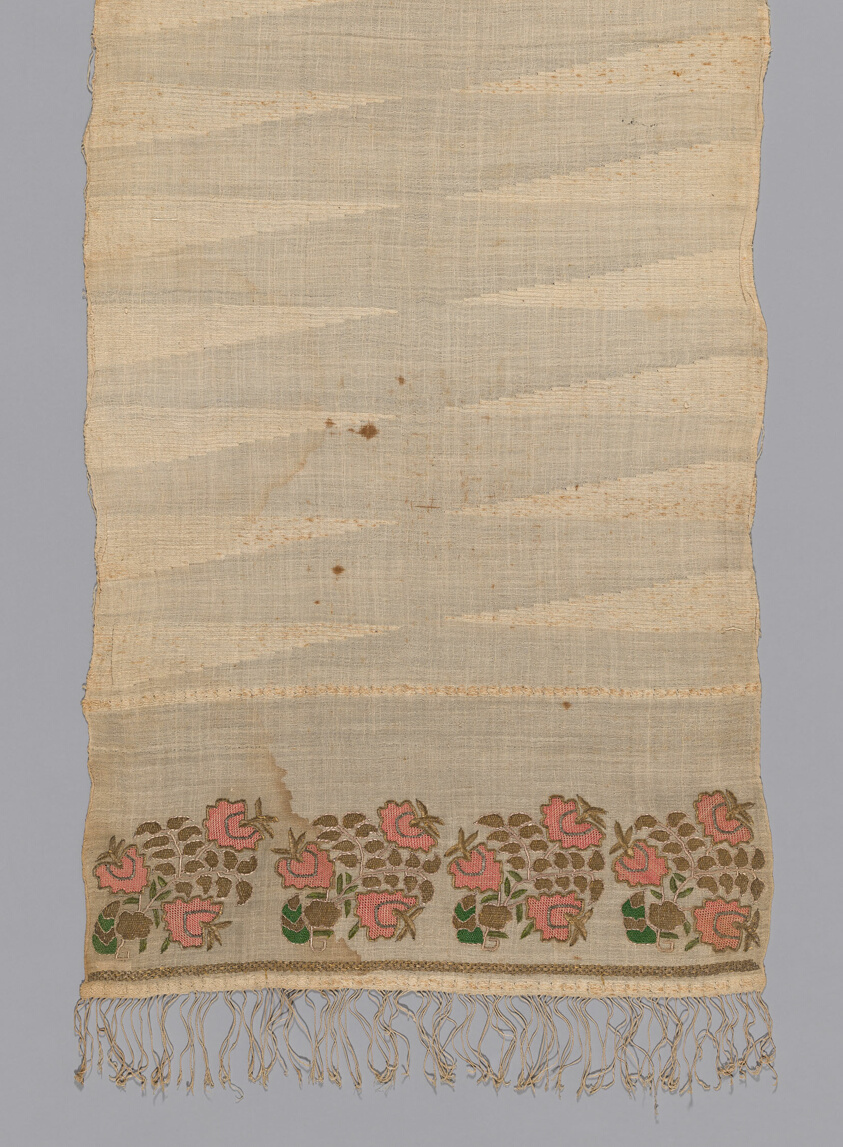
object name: Textile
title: Towel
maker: Turkey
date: 19th century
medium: embroidered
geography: Turkey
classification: textile; needlework (visual works); weaving